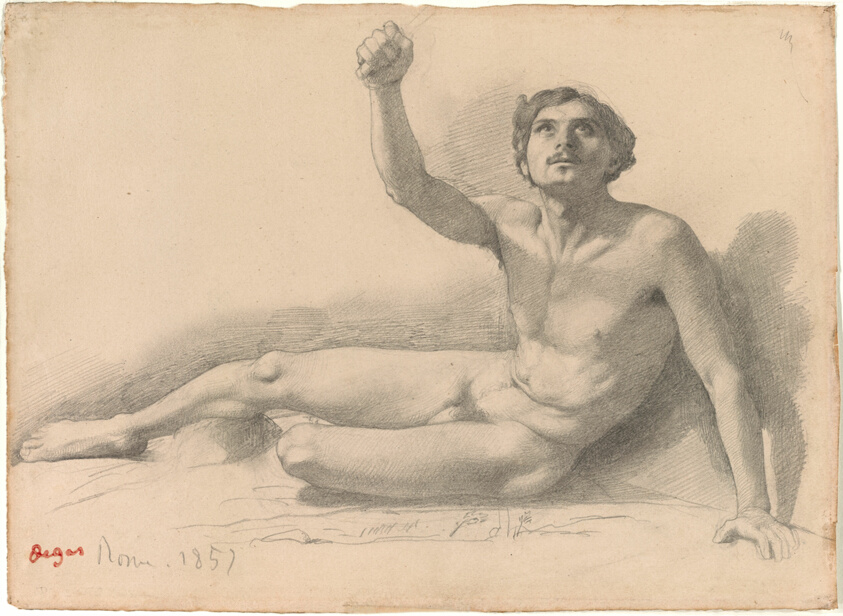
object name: Drawing and Watercolor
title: Study of a Male Nude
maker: Edgar Degas; French, 1834–1917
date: 1858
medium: Graphite on pink wove paper with pink and blue fibers, altered to buff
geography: France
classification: prints and drawing; graphite; drawings (visual works); paper